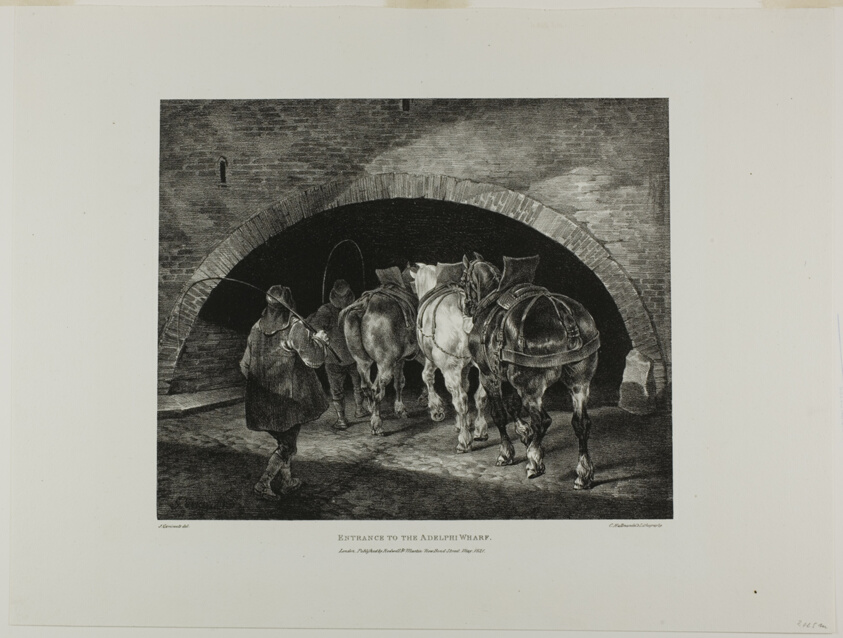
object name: Print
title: Entrance to the Adelphi Wharf, plate 11 from Various Subjects Drawn from Life and on Stone (The English Suite)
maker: Jean Louis André Théodore Géricault (French, 1791-1824); printed by Charles Joseph Hullmandel (German and English, 1789-1850); published by Rodwell and Martin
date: May 1821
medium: Lithograph in black on ivory wove paper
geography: France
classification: lithograph; print; prints and drawing